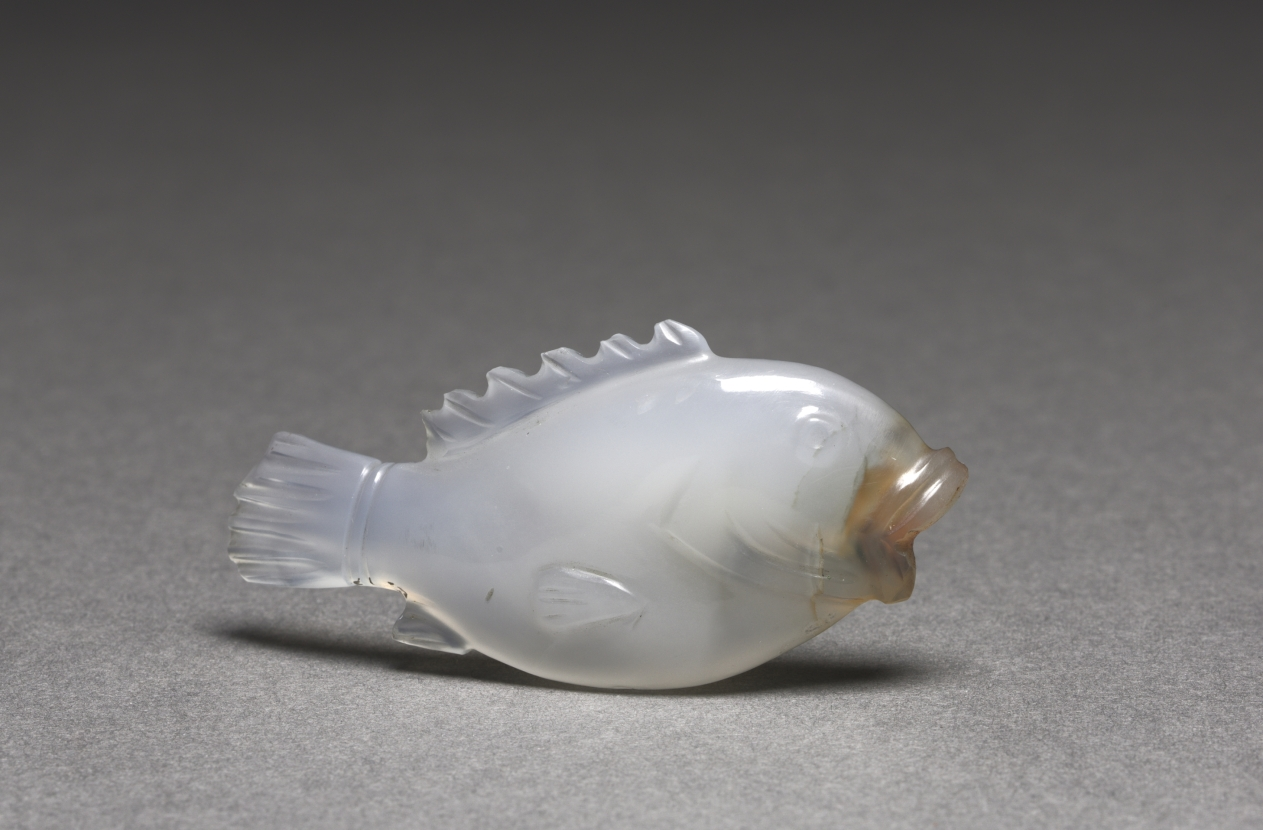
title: Fish Gem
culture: Syria(?) or Anatolia, early Christian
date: c. 250–350 CE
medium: rock crystal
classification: Glyptic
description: To avoid punishment, early Christians practiced their faith in secret. Images of fish were part of a code developed to refer to Jesus Christ. To those in the know, the Greek word for fish (ICHTHYS), was an acronym for the phrase Iesous Christos Theou Yios Soter which translates as Jesus Christ, Son of God, Savior.